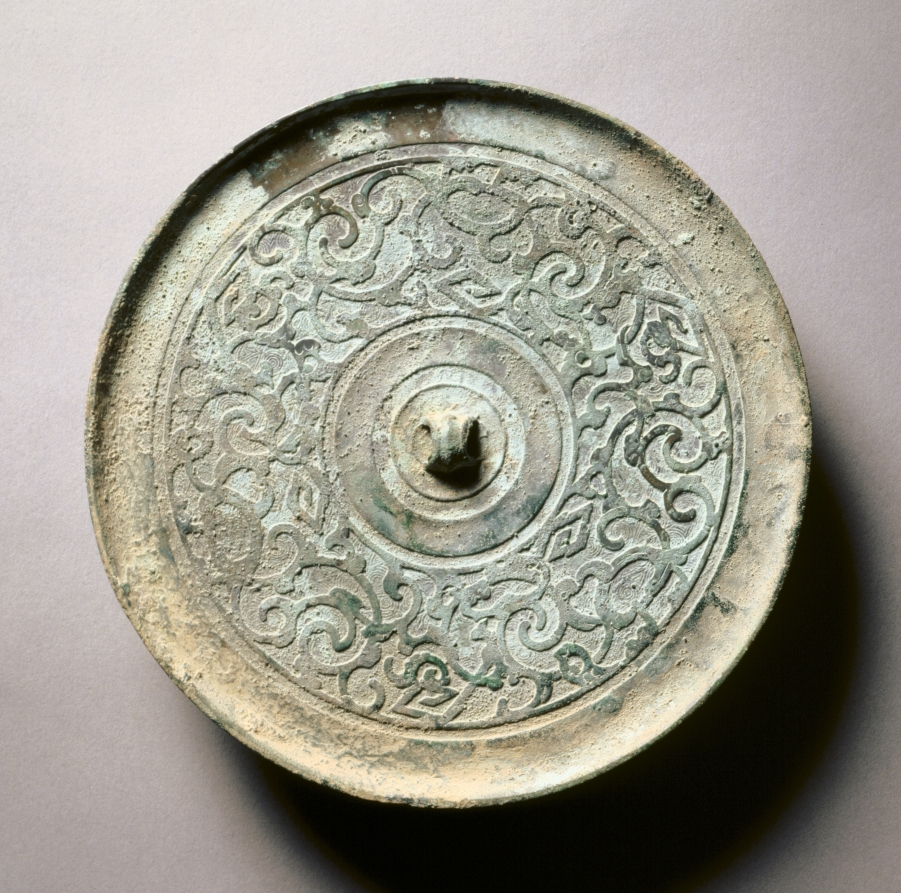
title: Mirror with Serpentine Interlaces and Angular Meanders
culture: China, Warring States period (475–221 BCE)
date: c. 325–275 BCE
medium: bronze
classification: Metalwork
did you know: This museum has the largest collection of Chinese mirrors outside of China.